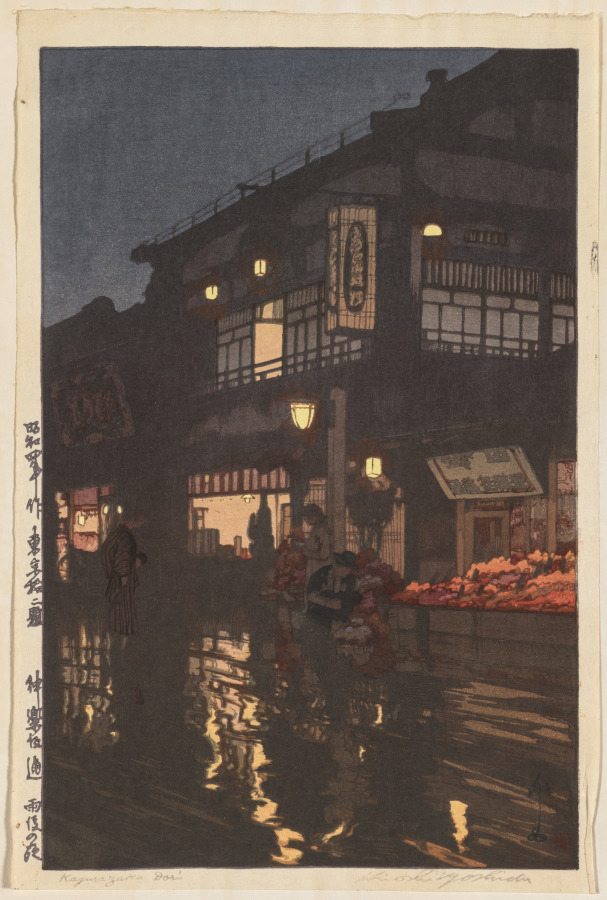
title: Twelve Scenes of Tokyo: Kagurazaka Street after a Night Rain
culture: Japan, Shōwa period (1926–89)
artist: Yoshida Hiroshi (Japanese, 1876–1950)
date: after 1929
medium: Woodblock print; ink and color on paper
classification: Print